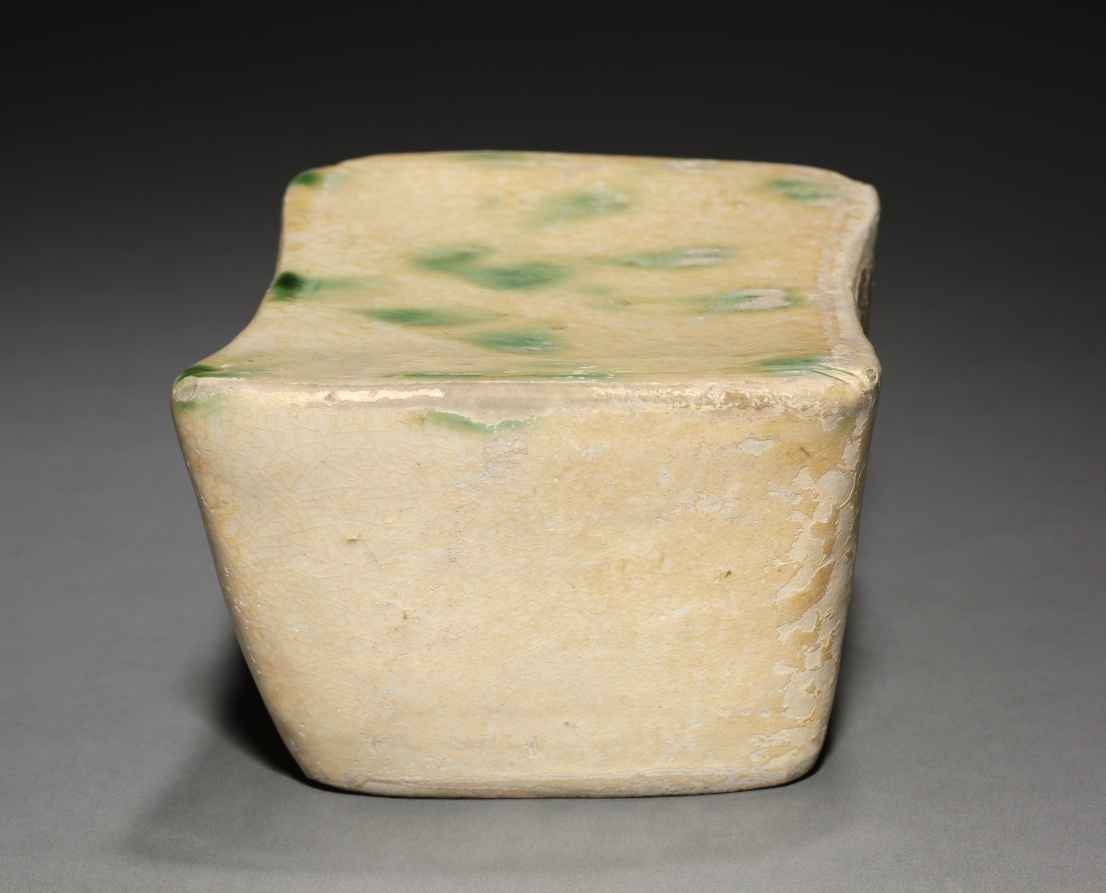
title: Pillow: Wazhaping ware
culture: China, Hunan province, Changsha, Five dynasties (907-960)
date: 906–960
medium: glazed stoneware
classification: Ceramic